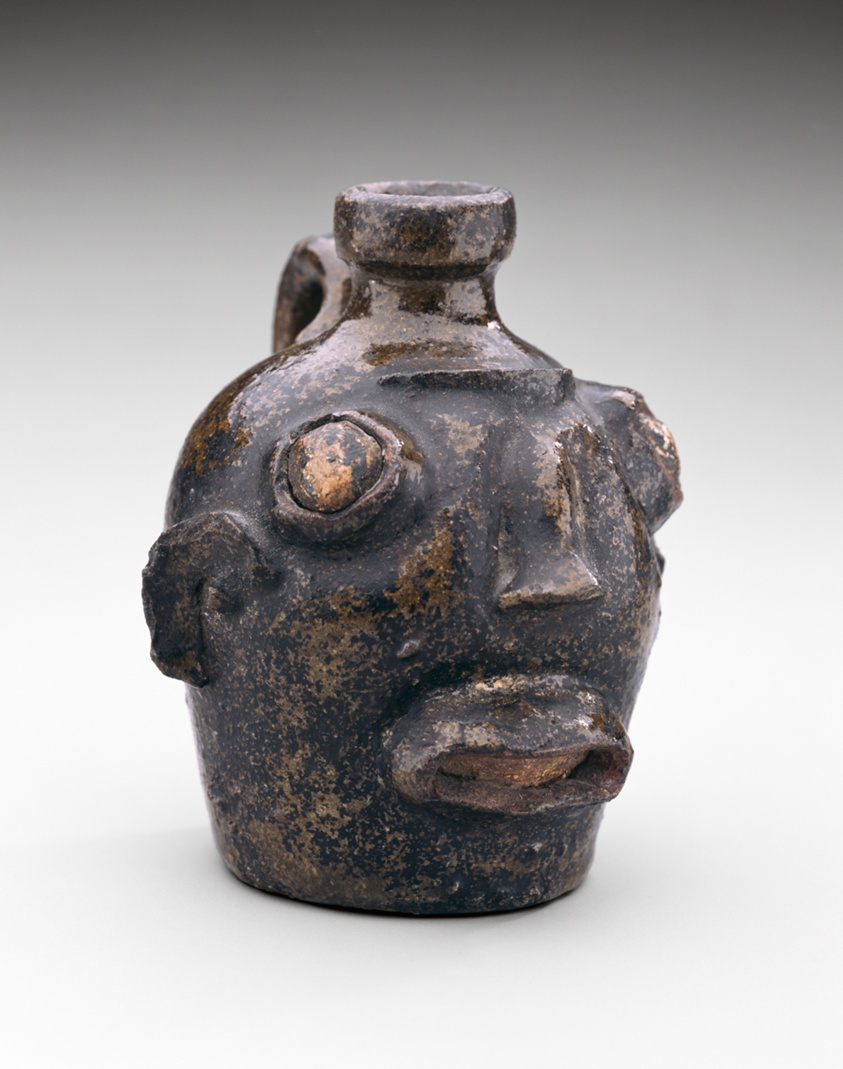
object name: Ceramics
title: Face Jug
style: Folk Art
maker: Artist unknown (American, 19th century); Edgefield District, South Carolina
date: c. 1860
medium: Stoneware and alkaline glaze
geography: Edgefield county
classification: vessel; american decorative arts; ceramics; decorative arts